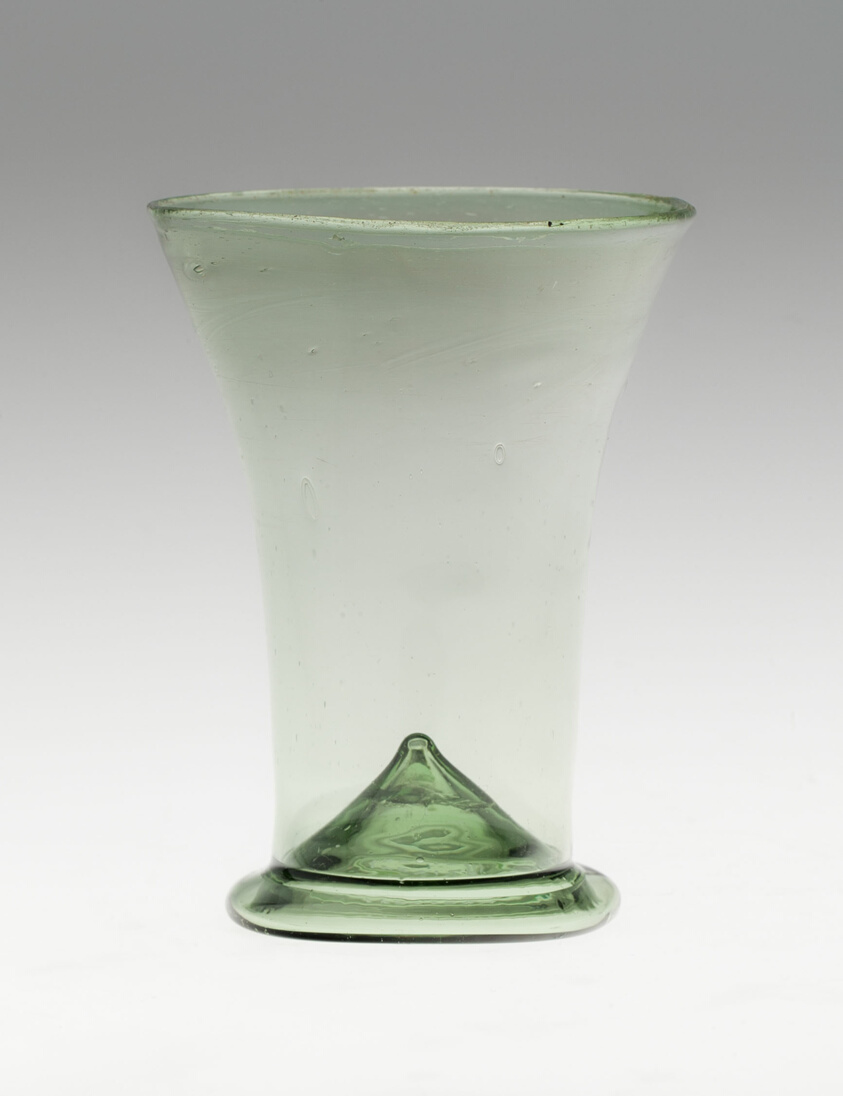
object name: Glass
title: Beaker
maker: German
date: 1500/1600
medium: Green glass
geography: Germany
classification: glass; european decorative arts